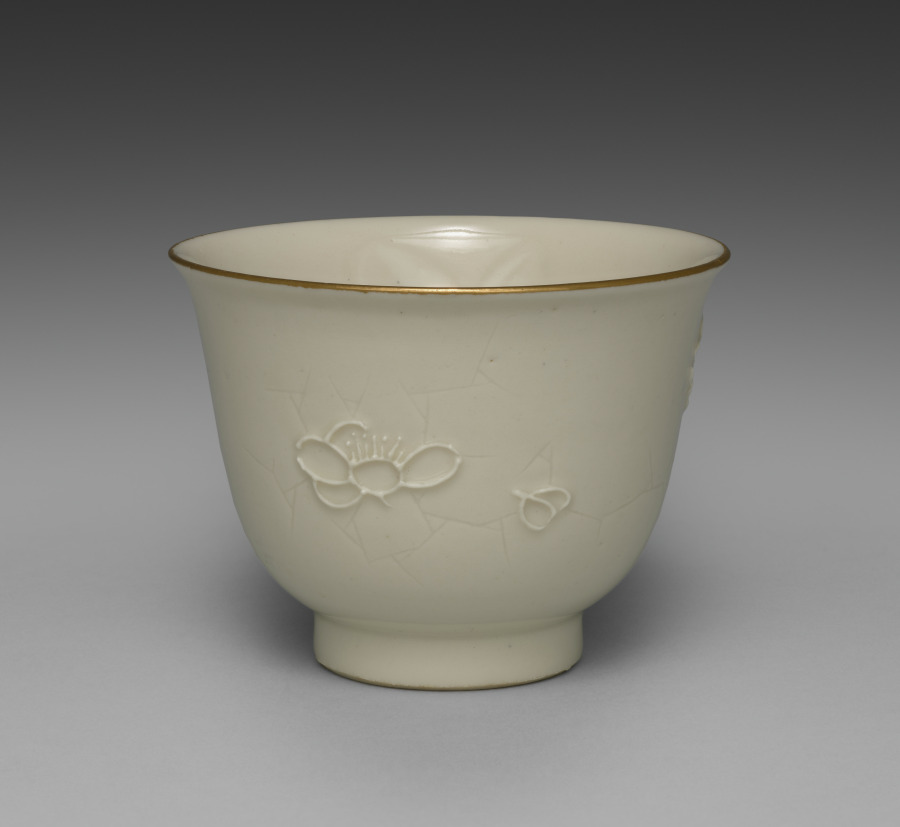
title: Drinking Cup from Dining Set with Plum Blossoms and Cracked-Ice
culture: Japan, Meiji period (1868–1912)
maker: Seifū Yohei II (Japanese, 1844–1878)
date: c. 1875–78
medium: Porcelain with molded designs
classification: Ceramic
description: Each item in this set has a delicate low-relief design of flowering plum branches over scattered, intersecting lines meant to resemble the cracked-ice surface of a frozen body of water and is signed on the base in gold pigment. While Yohei II produced many fine works in underglaze blue, like those produced by Kiyomizu Shichibei, he also made works in quite different styles later in his career, from the early 1870 s. In 1873, he was appointed purveyor to the Industrial Center of Kyoto Prefecture, a designation associated with Kyoto’s efforts to reach an international market through the port of Kobe; and from 1875 until his death, he was involved in national-level projects to present Japanese ceramics across the world. It was during this period that Yohei III was apprenticed to Yohei II, and it has been suggested that this set may in fact be an early example of Yohei III’s work, which he signed with his teacher’s name. Decorated with flowers resembling Japanese textile motifs, the set calls to mind the design of Yohei II’s pair of vases with plum blossoms in the Victoria and Albert Museum. Here, the elaborate trees created for a formal public exhibition setting have been translated into the approachable blossoms of the genteel domestic environment. While the designs are consistent across the pieces, each raised flower petal and pistil and each incised line in the ice was done by hand, so the cups, bowls, and dishes are similar yet unique. The bottoms of two boxes once identified the set’s owner, but the information has been deliberately obscured with black ink. However, inscriptions still visible appear to indicate two occasions, once at the end of July 1886 , and once again in June 1916 , when parts of the set were requested from Hokura in Niigata Prefecture. The location corresponds to a neighborhood in the present-day city of Jōetsu. The surname Tsuji 辻 also appears on a paper tag affixed to one of the box cloths. Future research may possibly reveal more about their provenance. A vase by Yohei III in a private collection combines the formal grandeur of the Yohei II vases in the Victoria and Albert Museum with the gentler design of this dining set, placing flowering plum trees against soft, scalloped-edge clouds resembling those in golden screens.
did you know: The dining wares have a creamy white coloration that the four boxes containing them identify as Korean in style.